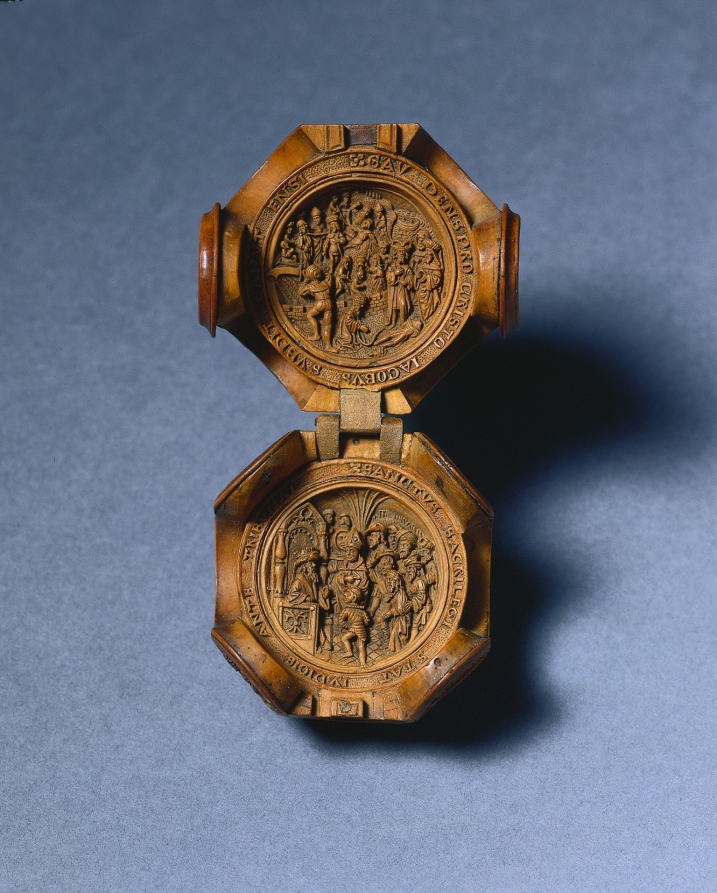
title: Prayer Nut with Scenes from the Life of St. James the Greater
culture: Northern Netherlands (Holland)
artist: Adam Dircksz (Netherlandish, active c. 1500)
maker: and Workshop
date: c. 1500–1530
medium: boxwood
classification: Sculpture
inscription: Interior around lower half: SANCTVS SACRILEGI STAT IVDICIS ANTE TRIBVNAL (Holiness stands before the throne of the profane judge)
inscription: Interior, around upper half: GAVDENS PRO CRISTO IACOBVS SVBDIT CAPVT ENSI (St James submits his head to the sword)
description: Prayer nuts are capsules that can be opened in half and were mainly worn from the end of the 1400s until 1530, particularly in the Netherlands. These objects are generally made from boxwood and carved with extreme refinement and delicacy. They often echo Gothic architecture and include openwork tracery or elaborate decorative patterns. Prayer nuts came into fashion for private devotion as a pendant on the rosary or on a decorative chain. The emergence of prayer nuts went hand in hand with the practice of praying the rosary more frequently at the end of the Middle Ages.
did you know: This miniature masterpiece was held and caressed within the palm of the holder as they prayed and meditated on their faith. What do you use to focus or engage in quiet concentration?